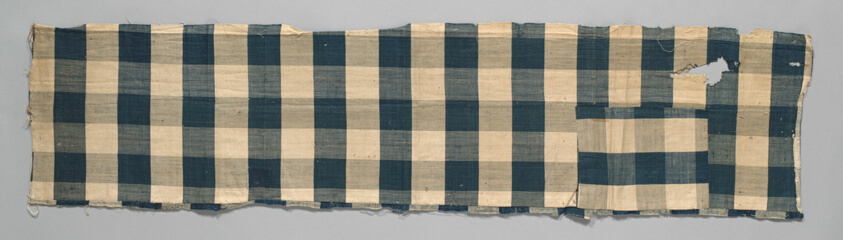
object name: Textile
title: Fragment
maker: United States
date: early 19th century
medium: Sample of stripe and check patterns of blue, white and tan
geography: United States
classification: textile; weaving